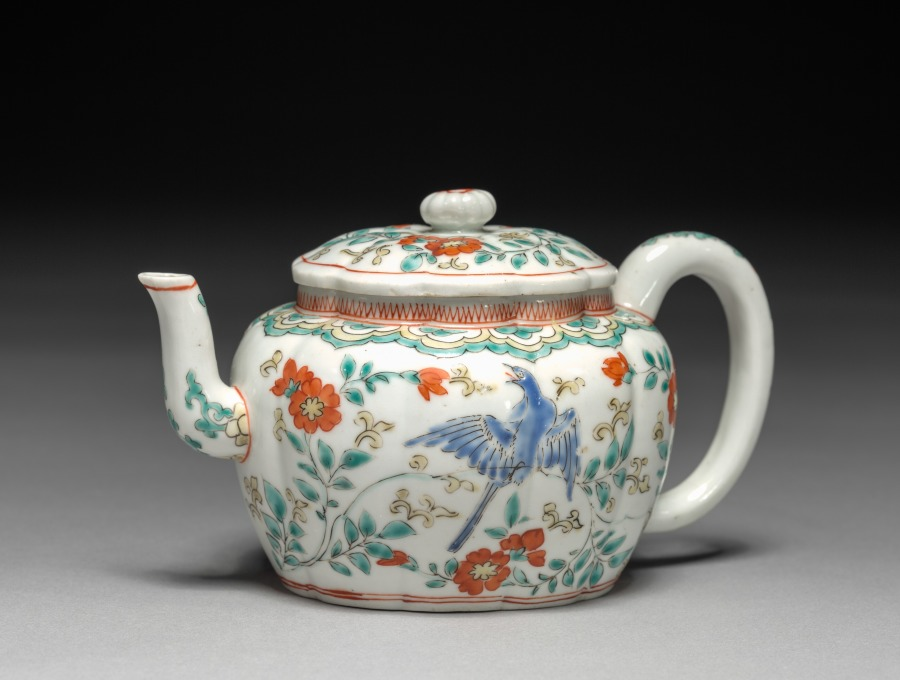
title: Teapot with Birds and Flowers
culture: Japan, Edo period (1615–1868)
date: 1700s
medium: Porcelain with overglaze color enamel (Arita ware)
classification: Ceramic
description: This small vessel was likely made as a teapot for the European export market. The different colored overglaze enamels, orange, blue, green, and yellow, combine with a wiry black outline to form the design of a singing bird on a flowering bough repeated on each side of the pot.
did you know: The wood storage box for this pot refers to it as a suichū, which means water ewer.